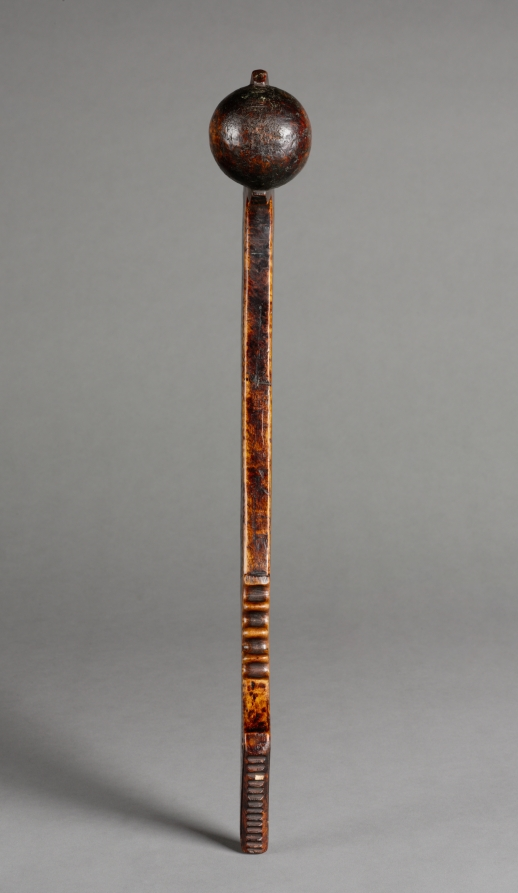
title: Ball-Headed War Club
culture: Native North America, Northeastern Woodlands, Great Lakes, Anishinaabe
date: late 1700s–early 1800s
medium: wood (maple?)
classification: Implements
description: The ball at the striking end of this club is clenched in an abstract, jawlike form that likely refers to a protector animal who endowed the owner with power. Incised on the shaft is a rich record of doodemag (singular, doodem, “totem”)—animals representing other-than-human progenitors from which Anishinaabe peoples trace their descent. (The Anishinaabeg, a group of related Great Lakes nations, include the Odawa, Ojibwe, Potawatomi, and others.) Included is an antlered creature, perhaps a caribou, along with mammals, birds, and powerful spirit beings: the thunderbird, its wings outstretched, and perhaps the long-tailed underwater panther. When this example was made, clubs had become symbols of status and earlier ways of life, having been replaced as favored weapons by metal tomahawks and European firearms. Today, clubs are part of powwow regalia.